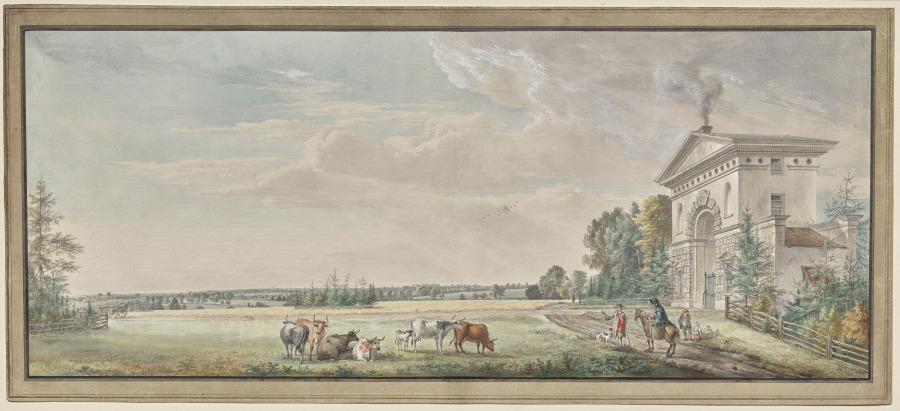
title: Luton Park, Bedfordshire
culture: England, 18th century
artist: Paul Sandby (British, 1731–1809)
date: 1760s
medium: watercolor over pencil, heightened with bodycolor and pen and gray ink on laid paper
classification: Drawing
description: Paul Sandby’s Luton Park, Bedfordshire, belongs to a set of twelve views commissioned by John, 3rd Earl of Bute (1713–1792) in the mid-1760s. After a period of public life, Bute retreated to the country, purchasing Luton Park north of London, and commissioning Paul Sandby to make watercolors recording the estate’s buildings and grounds. In Sandby’s subtle but luminous style, the present drawing depicts the fields outside the estate’s Palladian-style gatehouse, which appears on the right, nestled among trees. Wheat fields and trees populate the distant vista, and, in the center, one sees a view of the Luton castle. The work stayed together with all twelve of Sandby’s drawings in an album at Luton Park until it was discovered in 1996.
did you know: The Earl of Bute, owner of the estate depicted in this watercolor, was the favorite minister of King George III of England.